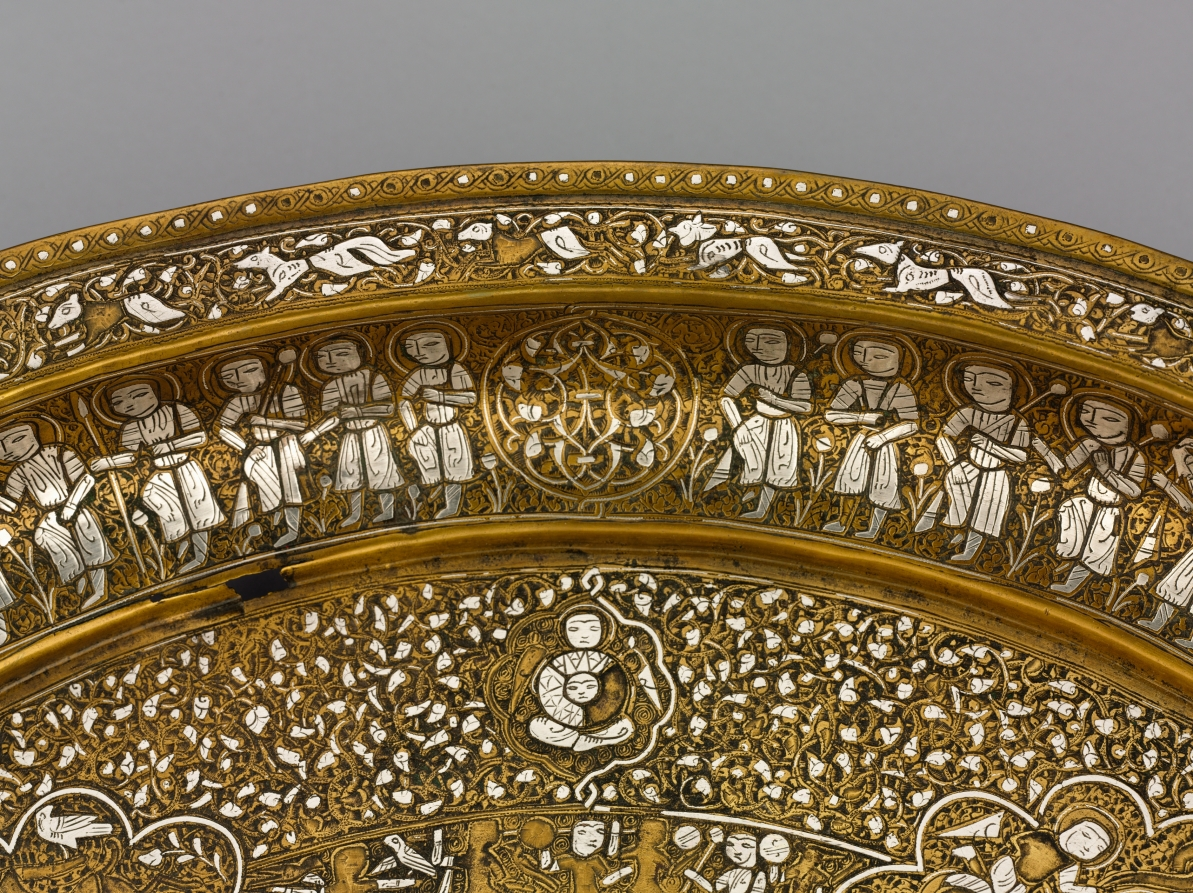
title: Tray Portraying Courtly Pleasures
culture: Syria, Ayyubid period (1171–1260)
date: 1240s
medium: sheet brass inlaid with silver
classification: Metalwork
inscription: The presence of ligatures in the narrow circular bands with interconnected human and animal figures suggests this may be a degenerate form of animated script. It is indecipherable.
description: This tray features images of courtly life interspersed with astronomical symbols. The scenes contained within large multilobed medallions display an enthroned prince with lions at his feet, a banquet, a hunt, dancers, and musicians. Contained within the concentric circles there are also references to solar and lunar motifs, including figures holding sunbursts and lunar crescents. This tray is made of a single sheet of brass and the silver inlay, which is best preserved on the tray’s inner curve, suggests its original brilliance.